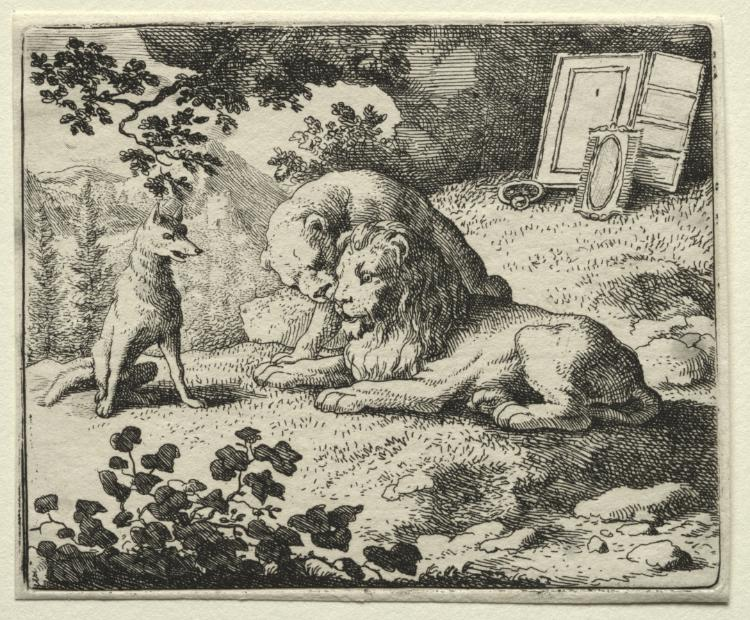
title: Reynard the Fox: Reynard Promises Gifts to the Lion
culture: Netherlands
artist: Allart van Everdingen (Dutch, 1621–1675)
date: 1650–75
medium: etching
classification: Print